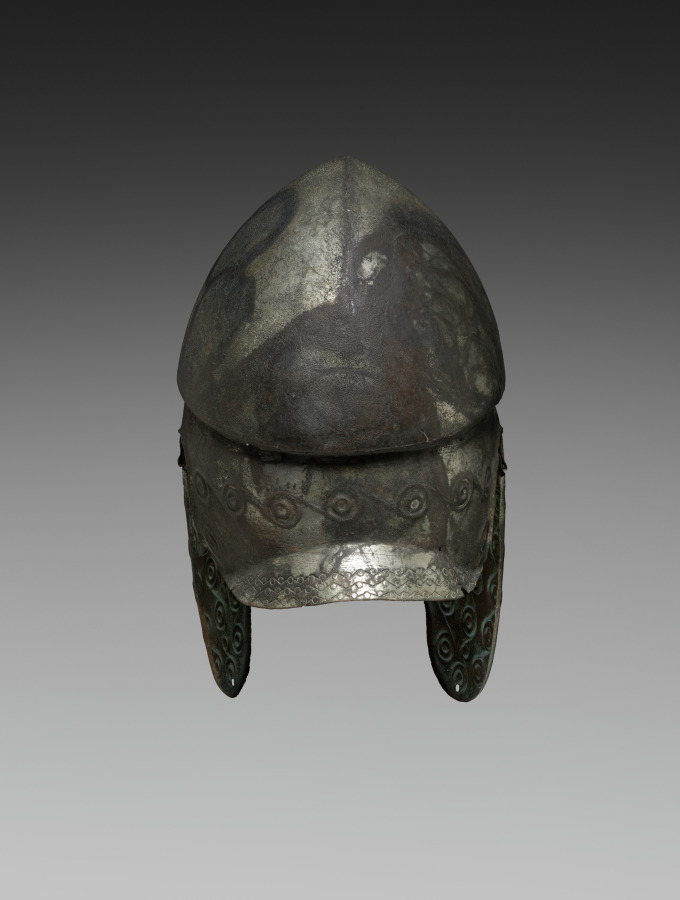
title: Chalcidian Helmet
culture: Greek (perhaps Black Sea area)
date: c. 350–200 BCE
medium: Tinned bronze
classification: Arms and Armor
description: Among ancient helmets, the Chalcidian type is varied, widespread, and comparatively unrestrictive, with relatively wide openings for the eyes and ears. This example, probably made in the Black Sea region or even further east, features a pointed noseguard, high carinated crown, molded brow ridge, and everted rear flange, plus large separately made hinged cheekpieces. The tinned bronze surface is almost silver in color, with extensive decoration including small incised linked scrolls and much larger embossed linked scrolls.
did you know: Although named for Chalcis, a city in Euboia, Chalcidean helmets were made across the Greek world.